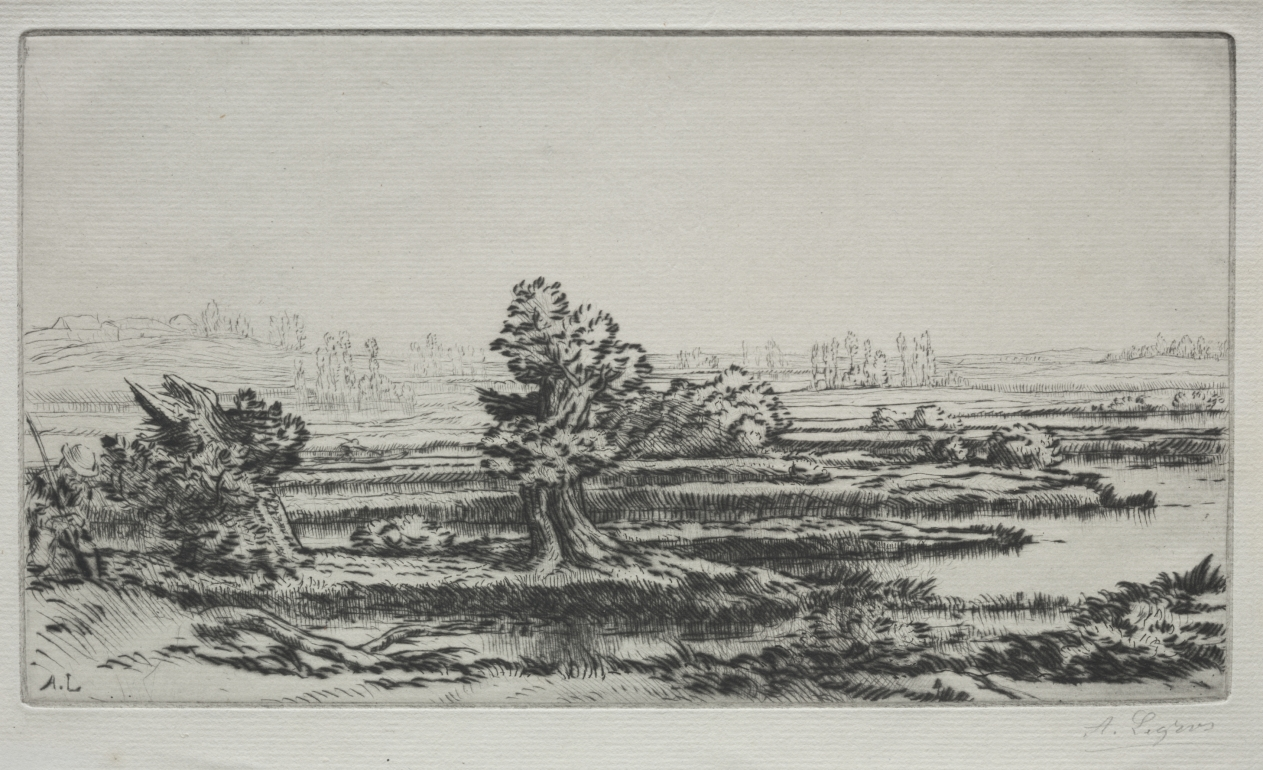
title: Landscape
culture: France, 19th century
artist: Alphonse Legros (French, 1837–1911)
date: c. 1857–1911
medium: drypoint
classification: Print